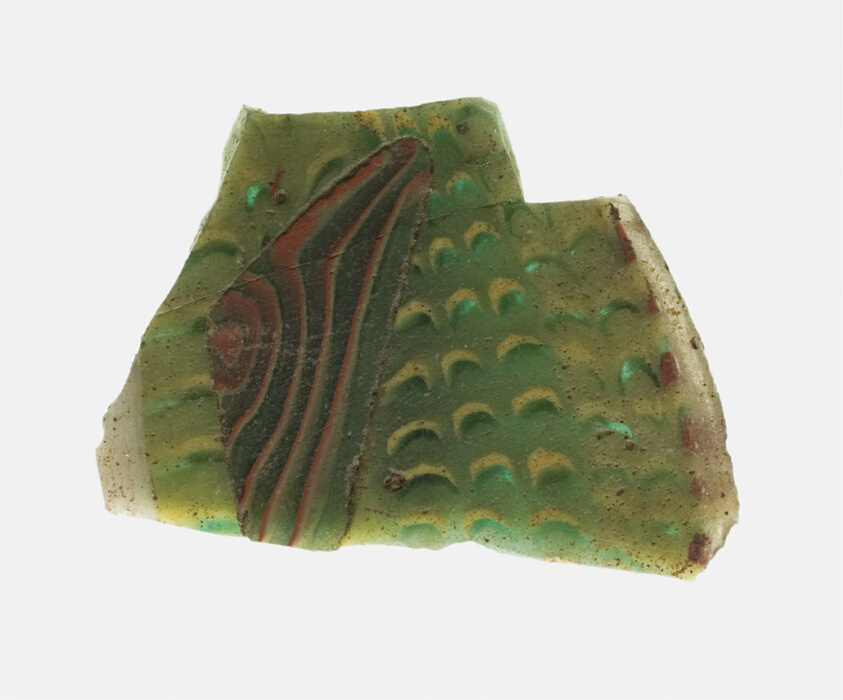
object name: Decorative Arts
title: Fragment of a Revetment Depicting Fish Scales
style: roman (ancient, style or period), ancient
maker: Roman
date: 1st century BCE–1st century CE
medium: Glass, mosaic glass technique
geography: Roman Empire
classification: fragment; decorative arts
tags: decoration, sealife